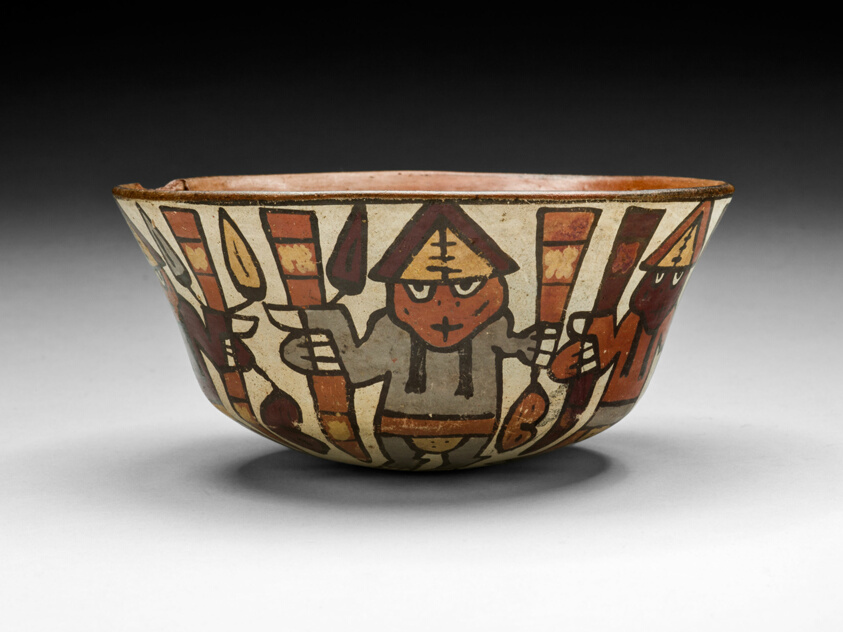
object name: Vessel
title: Bowl Depicting a Harvest Dance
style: nazca, early intermediate period, Pre-Columbian, americas, andes, Arts of the Americas, andean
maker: Nazca; South coast, Peru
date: 180 BCE–500 CE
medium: Ceramic and pigment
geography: Peru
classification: bowl; earthenware; art of the americas; ceramics; vessel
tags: people, landscapes, agriculture, ritual